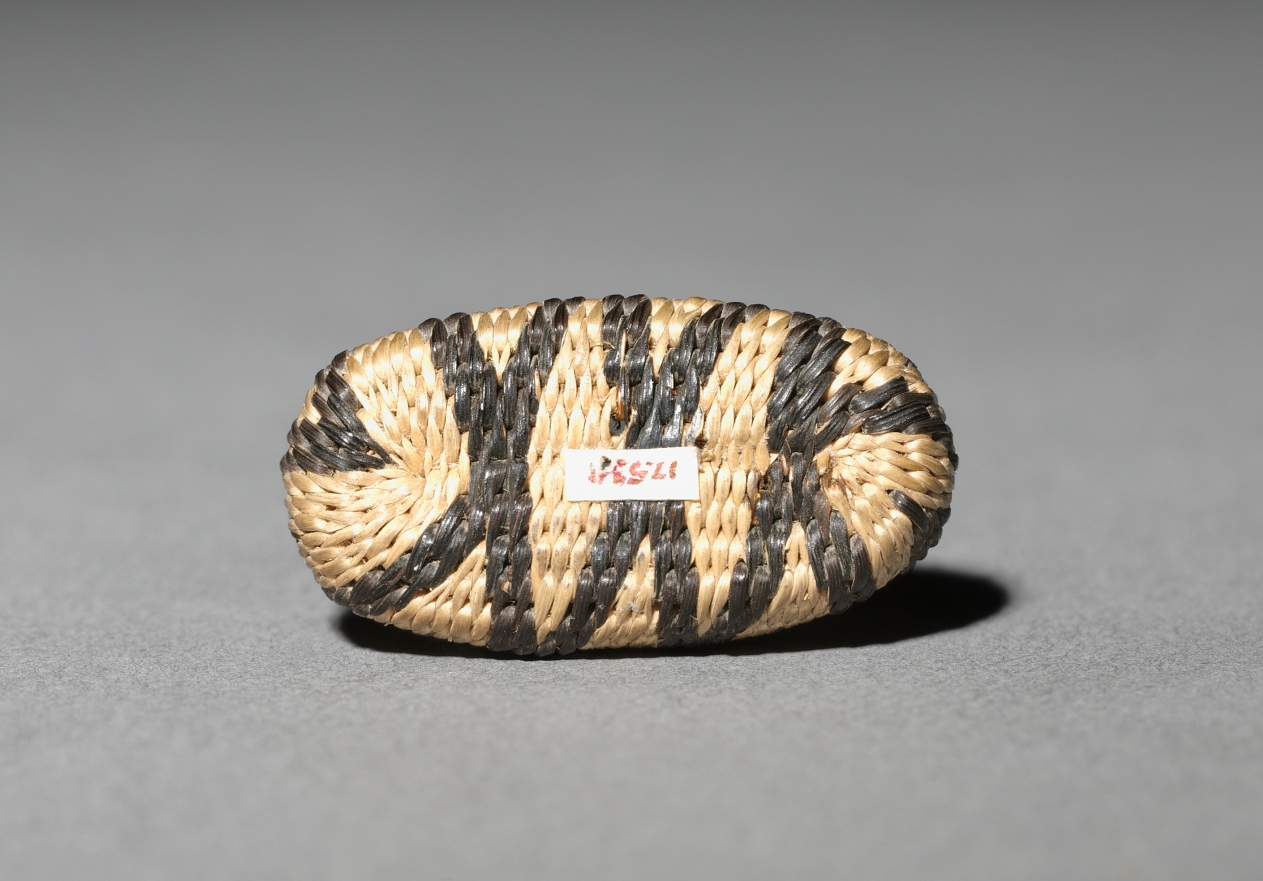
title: Miniature Oval Basket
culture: California, Pomo, late 19th-early 20th century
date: late 1800s-early 1900s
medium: plant materials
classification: Basketry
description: Miniature baskets were made to demonstrate the basket-maker’s virtuoso skill, and these tiny marvels seem to be no exception—the smallest are just a few millimeters wide but still patterned. For such fine work, dexterity was required as much for preparation of materials as for weaving.